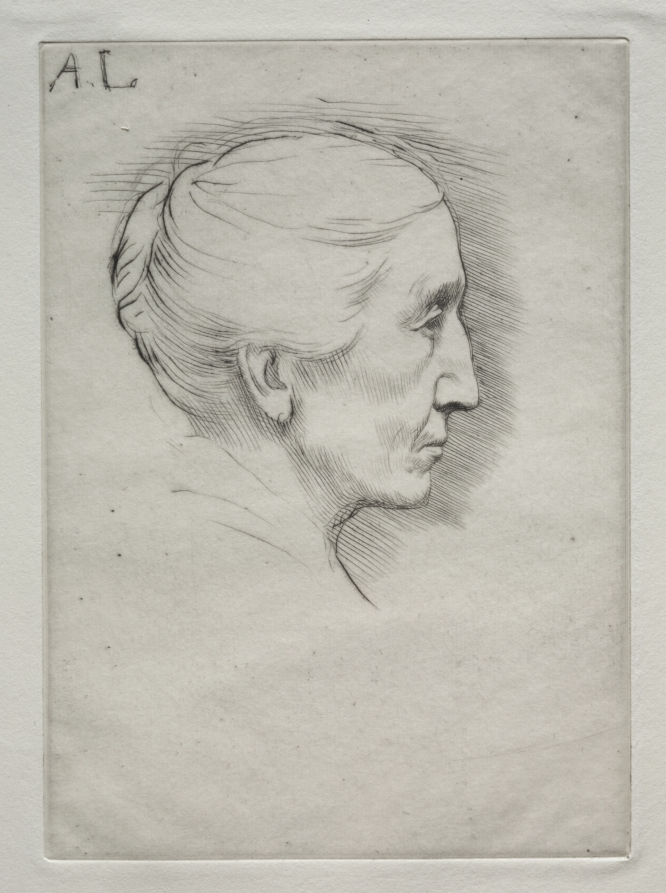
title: Portrait of Mme. Emily Hughes (1st Plate)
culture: France, 19th century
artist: Alphonse Legros (French, 1837–1911)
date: c. 1857–1911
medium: drypoint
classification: Print